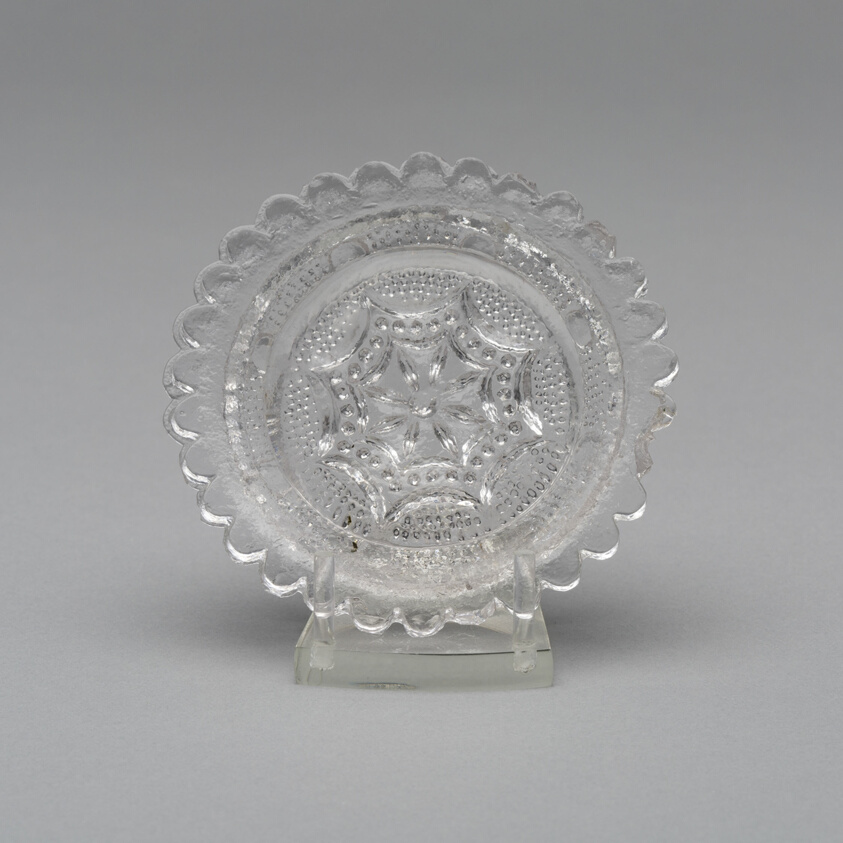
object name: Glass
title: Cup plate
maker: Artist unknown (American, 19th century); Probably Pittsburgh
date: c. 1830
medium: Pressed glass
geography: Pittsburgh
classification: plate (general, dish); glass; american decorative arts; american arts; decorative arts